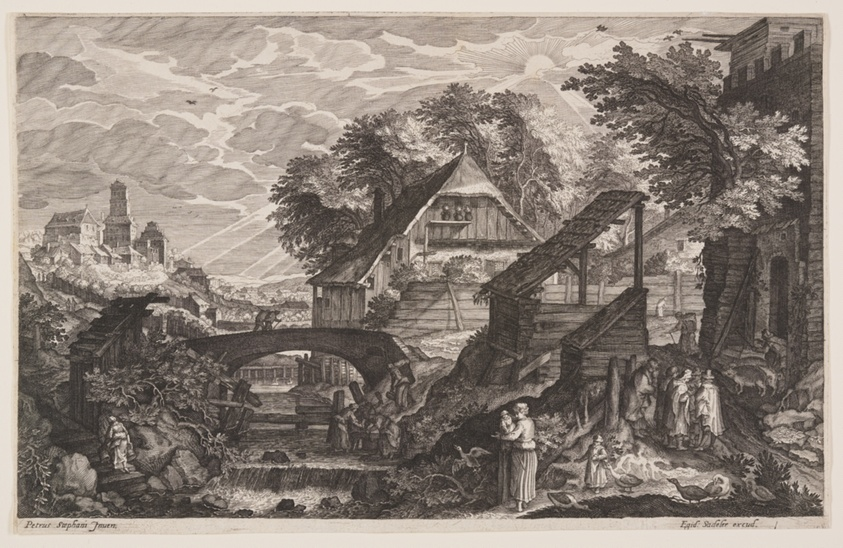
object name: Print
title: Farmhouses on the Right of a River, from Eight Scenes from Bohemia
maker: Aegidius Sadeler II (Flemish, c. 1570–1629); after Pieter Stevens (Flemish, 1567-after 1624)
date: c. 1610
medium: Engraving on ivory laid paper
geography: Flanders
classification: print; paper; prints and drawing; engraving